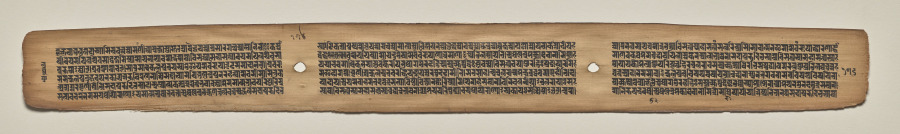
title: Text, folio 176 (verso), from a Manuscript of the Perfection of Wisdom in Eight Thousand Lines (Ashtasahasrika Prajnaparamita-sutra)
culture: Eastern India, Bihar, Vikramashila Monastery. Painting: Nepal, Kathmandu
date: Sunday, September 14, 1119 (year 239 of the Newar Samvat in the month of Ashvina)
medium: gum tempera and ink on palm leaves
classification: Painting